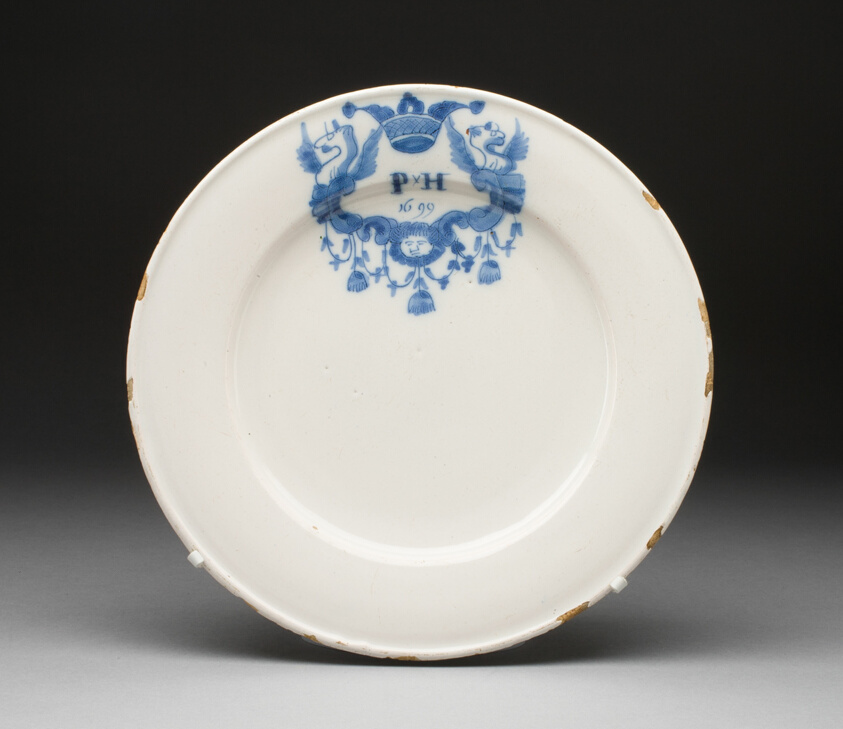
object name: Ceramics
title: Plate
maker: Haarlem, Netherlands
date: 1699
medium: Tin-glazed earthenware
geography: Haarlem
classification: plate (general, dish); dish (vessel); earthenware; ceramics; european decorative arts